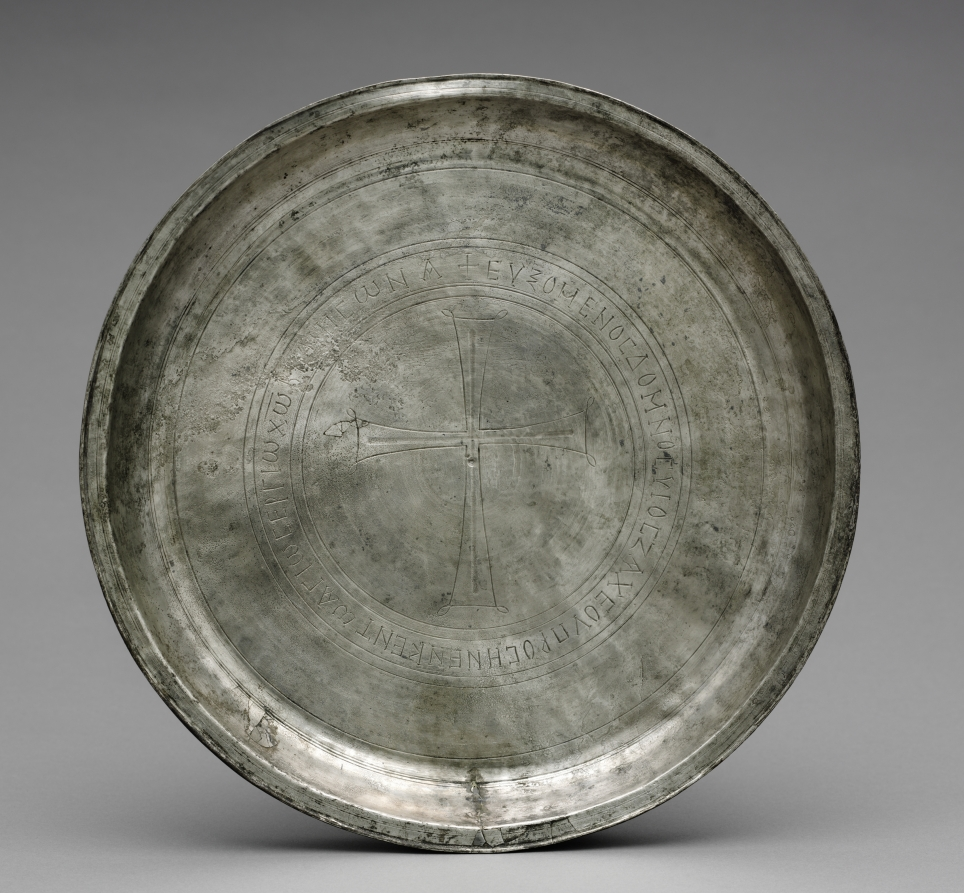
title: Paten (Dedicated to Saint Sergius) from the Beth Misona Treasure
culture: early Byzantium, Constantinople or Syria, Byzantine period, 6th-7th Century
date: c. 500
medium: silver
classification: Metalwork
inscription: the Greek inscription surrounding the cross in the center translates as: + Having vowed, DOMNOS, son of ZACHEOS, has offered (this paten) to St. Sergois of the village of Beth Misona.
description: These four liturgical silver vessels—a paten and three chalices (1950.378–81)—form what is now called the Beth Misona Treasure, named for the village in northern Syria for which the objects were made. While nothing is known about the exact location and circumstances of the treasure's discovery, the people of the village of Beth Misona were, like other Christian communities in Syria and Palestine, probably forced to bury their church silver to hide it from the Persians or Arabs, who conquered their lands in the first half of the 600s. The paten, which held pieces of Eucharistic bread used during Mass, is decorated with an engraved Latin cross surrounded by a dedicatory inscription that names the paten's donor—Domnos—and its original location, the church of Saint Sergios in Beth Misona. The chalices, which contained the Eucharistic wine used during Mass, feature broad cups decorated with portrait busts of Saints Peter and Paul, Christ, and the Virgin. One chalice bears a dedicatory inscription naming its donor—Kyriakos, Domnos's son—and the priest of the church that received the pious gift—Zeno.